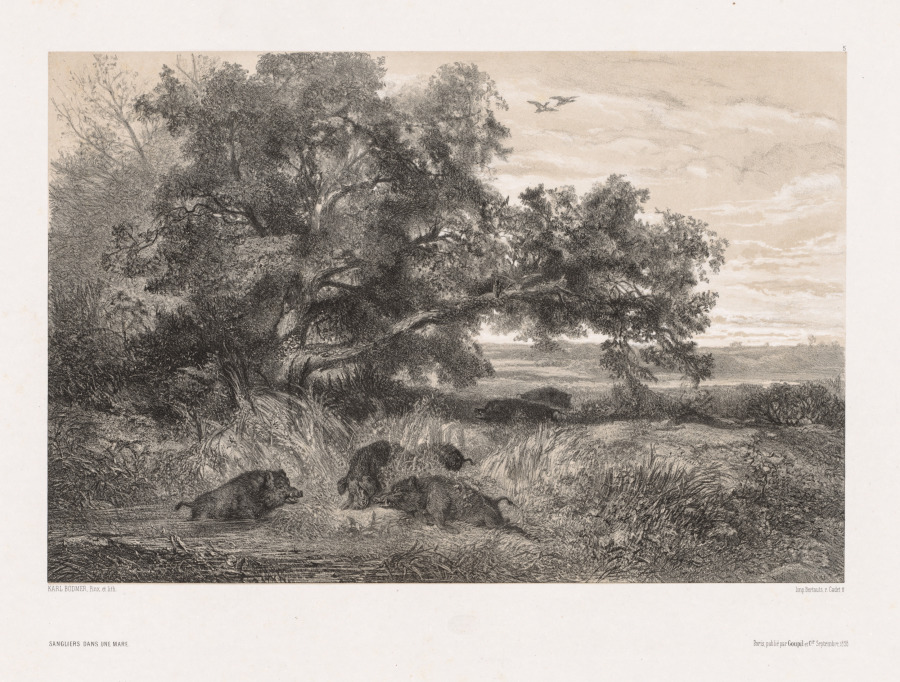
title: Animals and Landscape after Nature: Wild Boar in a Pond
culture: Switzerland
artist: Karl Bodmer (Swiss, 1809–1893)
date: c. 1850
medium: lithograph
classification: Print